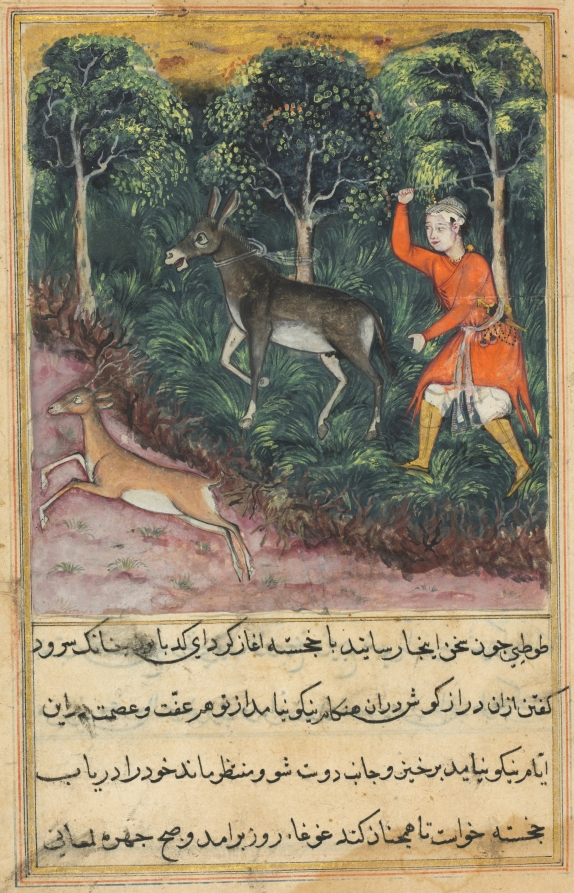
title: The gardener seizes and beats a donkey who insisted on braying, while the deer, its companion flees to safety, from a Tuti-nama (Tales of a Parrot): Forty-first Night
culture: Mughal India, court of Akbar (reigned 1556–1605)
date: c. 1560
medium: gum tempera, ink, and gold on paper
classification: Painting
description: On the right, the furious gardener raises his staff to strike the ensnared donkey, who struggles to escape his bonds. The deer had previously tried to warn the donkey that his loud and abrasive singing would be his downfall. However, the stubborn donkey could not resist the temptation to bray.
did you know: The male spotted deer with delicate white antlers is known as a chital and is native to India.